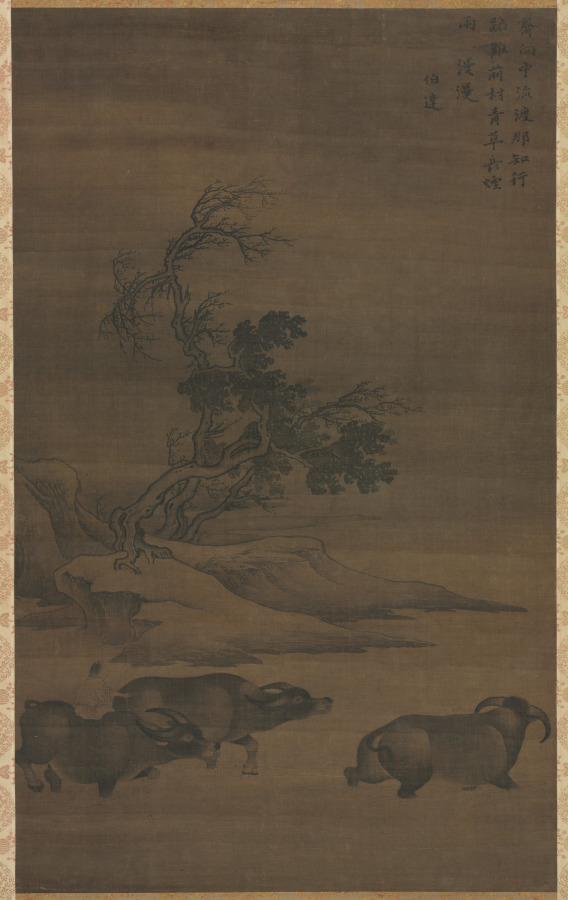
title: Herdboys and Buffalo in Landscape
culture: China, Qixian, Yuan dynasty (1271-1368)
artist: Guo Min (Chinese, mid-late 1200s)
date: 1200s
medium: Hanging scroll; ink on silk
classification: Painting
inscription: 齊向中流渡，那知行路難。/ 前村青草長，煙雨□漫漫。/ 伯達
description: Herdboys tend their buffalo in a bucolic landscape by a winding stream. Guo Min emphasizes the massive forms and mighty power of the animals, transforming them into forces of nature. The poem on this scroll reads: "Together, they wade through the middle of the stream, Mindless of perils in the journey. The grass grows tall in the village ahead, While the mist and rain spread far and wide."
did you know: Tending water buffalos has traditionally been the task of young boys and can still be seen in rural areas of Southern China today.